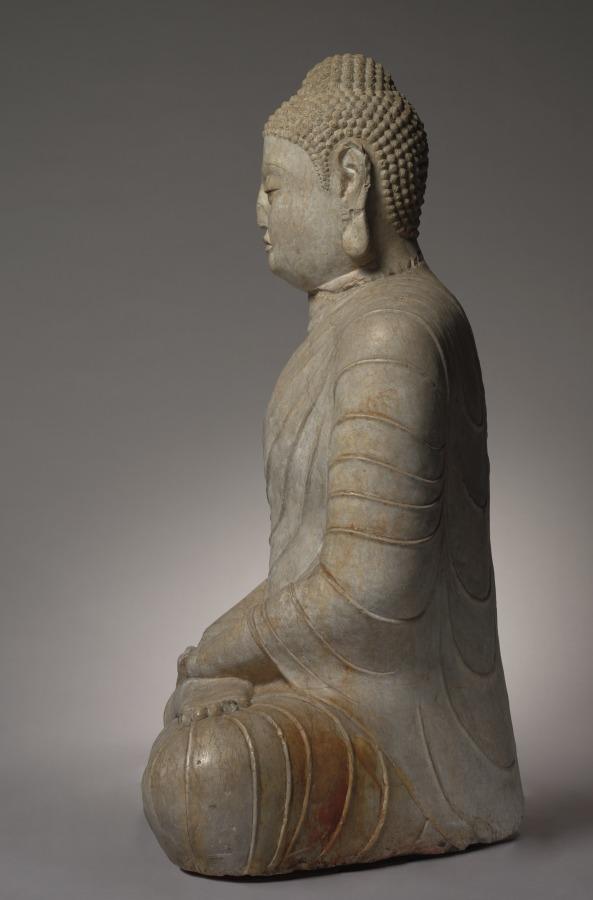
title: Seated Amitayus Buddha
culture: China, Northern Qi dynasty (550-577)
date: c. 570s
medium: marble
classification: Sculpture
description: Amitayus, the Buddha of Infinite Life, is seated in meditation on a double lotus pedestal. The pedestal was not made with the statue but the combination is faithful to the original artistic conception. The statue is an extremely rare example of a major type of Northern Qi Buddhist sculpture. The heavy, massive front highlights the sense of monumentality and the spiritual essence of the Buddha. Today the sculpture is united with a pedestal that exhibits the rich, ornate style of early Tang sculpture. It was commissioned by the Duke of Liang, Fang Xuanling (578–648), for the blessing of his second son and daughter-in-law, the Tang imperial princess of Gaoyang. The iconography and inscription suggest that it originally went with a statue, now missing, of Shakyamuni, the historical Buddha, instead of Amitayus.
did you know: The stringlike folds of the Buddha's draperies emphasize his monumental, rigidly erect torso and tubular limbs.